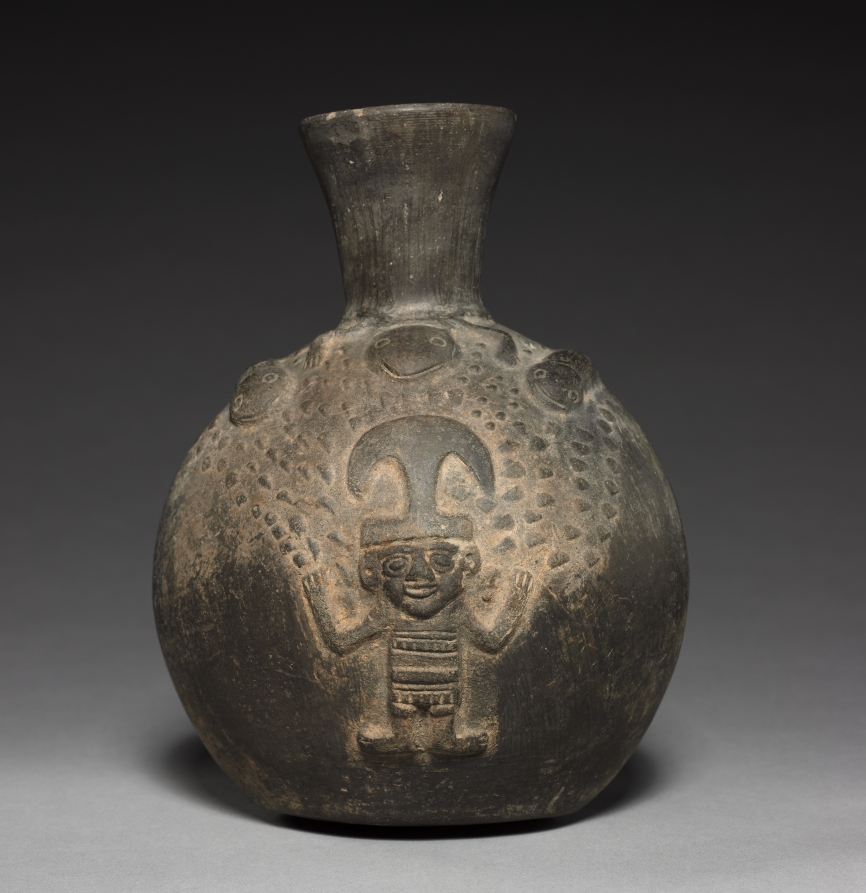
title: Bottle with Figure in Relief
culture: Peru, probably Chiclaya, Chimú, 13th-15th century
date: 1200s-1400s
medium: black ware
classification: Ceramic